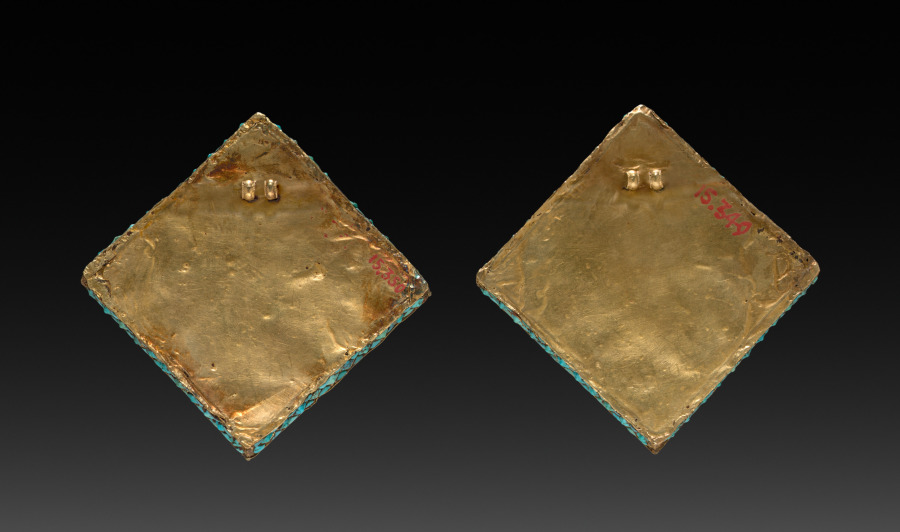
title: Charm Case Pair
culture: Tibet, 19th century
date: 1800s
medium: gold with jewels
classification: Jewelry